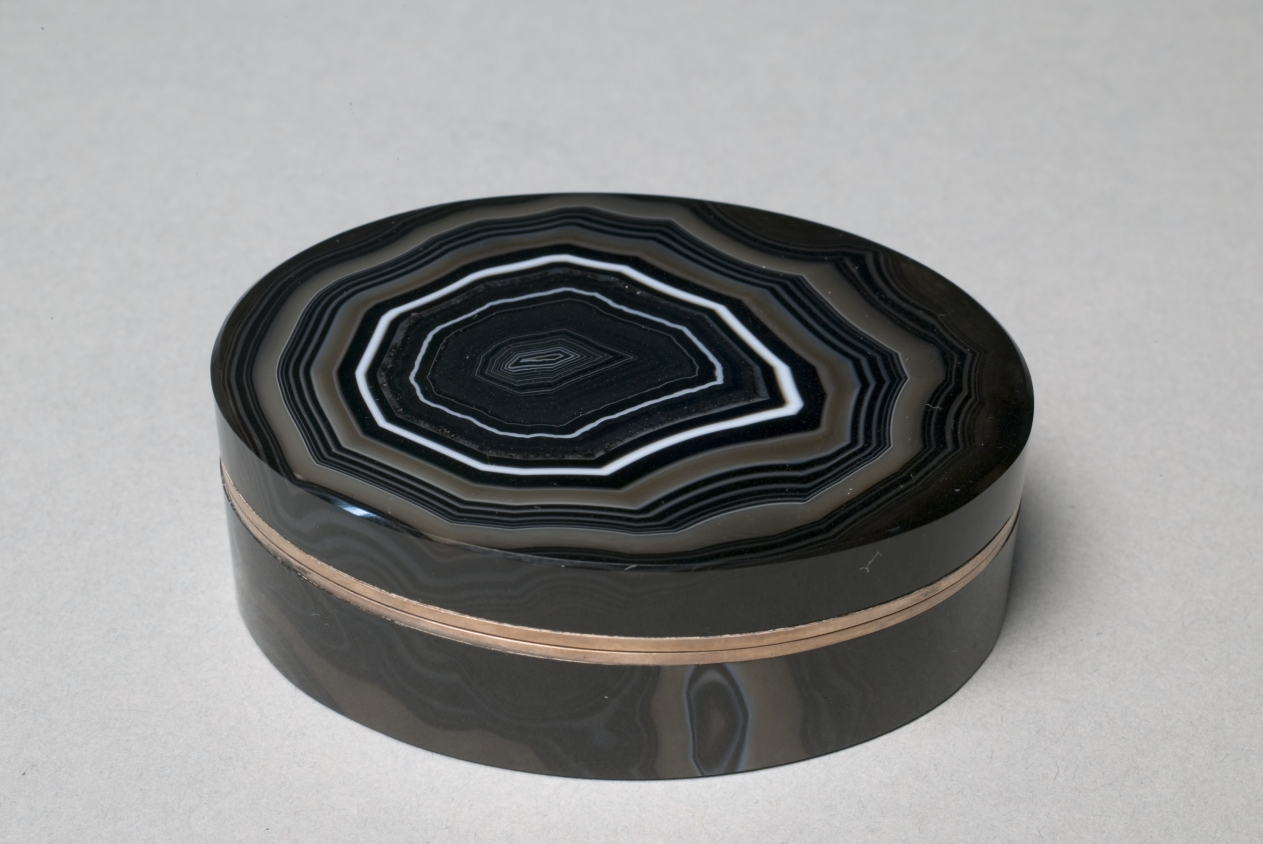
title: Snuff Box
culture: Germany, 19th century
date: c. 1830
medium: agate, gilt-metal mounts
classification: Miscellaneous